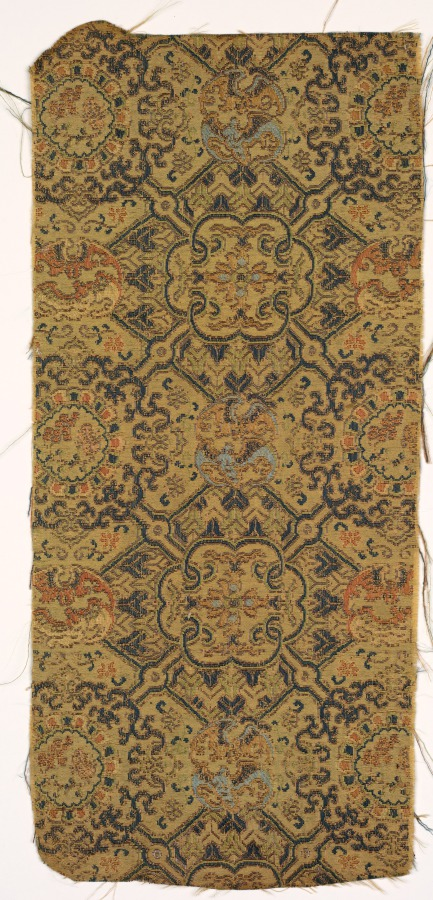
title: Fragment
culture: China, 19th century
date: 1800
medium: silk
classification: Textile